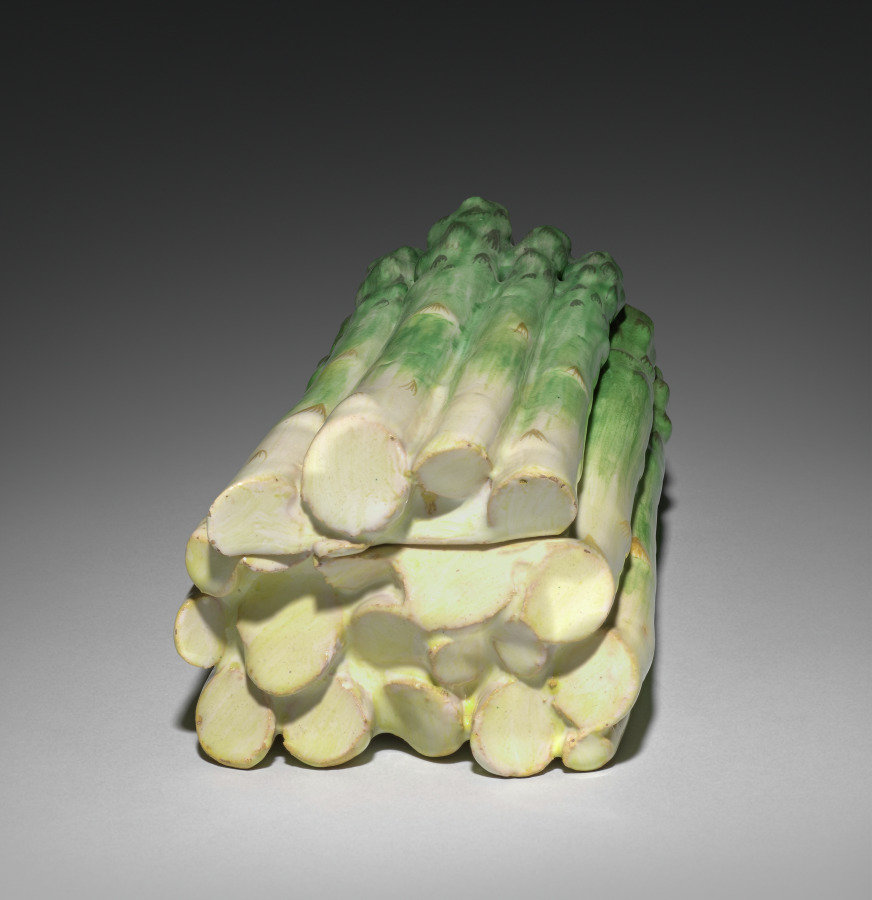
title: Box in the Form of Asparagus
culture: France, Sceaux(?), 18th century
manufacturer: probably by Sceaux Factory (French, active 1748–66)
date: c. 1765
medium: tin-glazed earthenware (faience) with enamel decoration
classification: Ceramic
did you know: Placed upon the dinner table, this container's lid might be lifted to reveal steaming asparagus. Imagine a wealthy 18th-century dining room with flickering candles, whimsical sculptures, and dishes like this decorating the table.